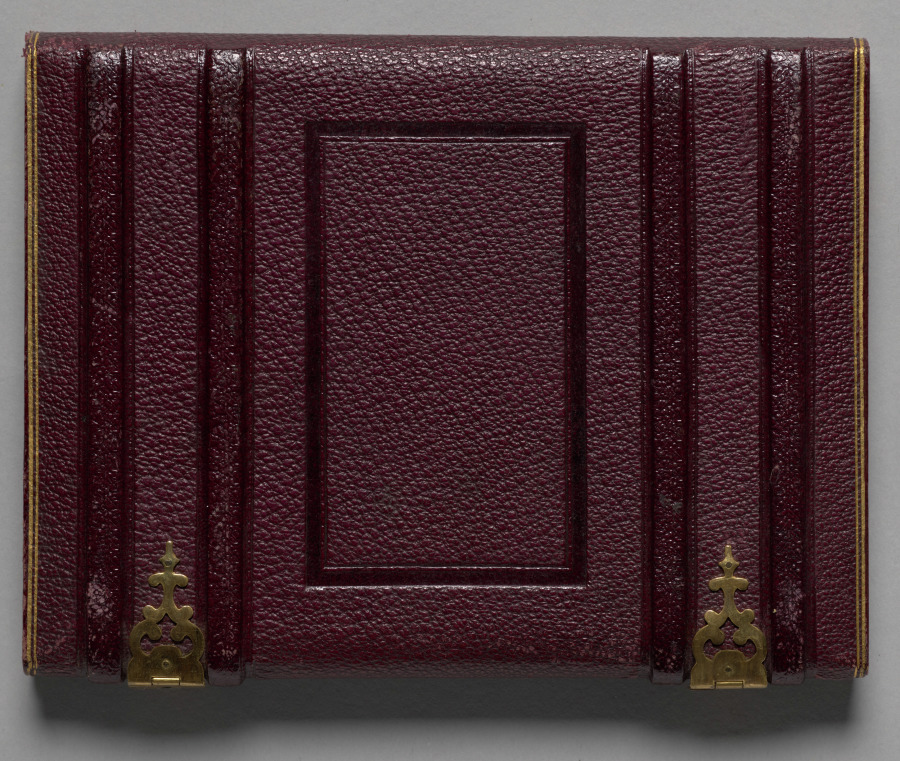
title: English family of five with marble bust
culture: England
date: 1850–65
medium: ambrotype, half plate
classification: Photograph